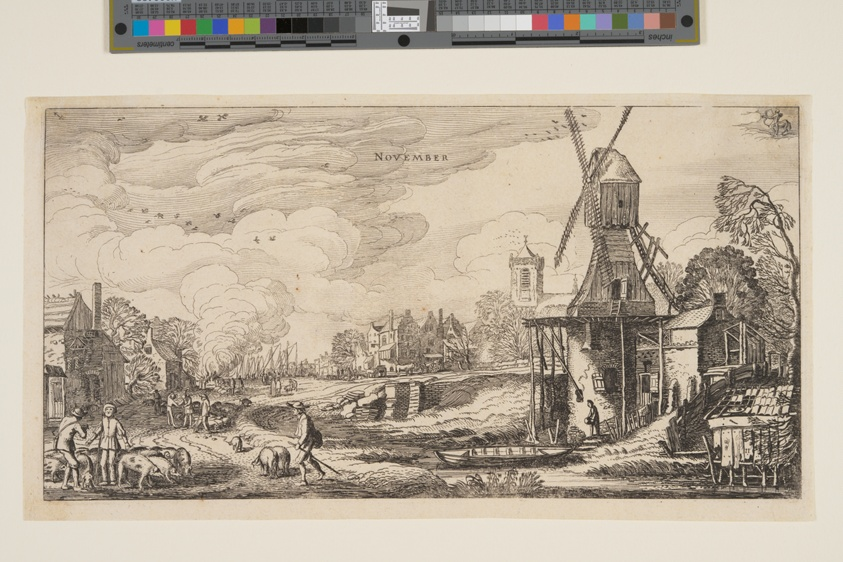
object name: Print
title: November, from The Twelve Months of the Year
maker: Jan van de Velde II (Dutch, c. 1593–1641); after Willem Buytewech (Dutch, c. 1591–1624)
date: 1616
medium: Etching on ivory laid paper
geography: Netherlands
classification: etching; paper; print; prints and drawing